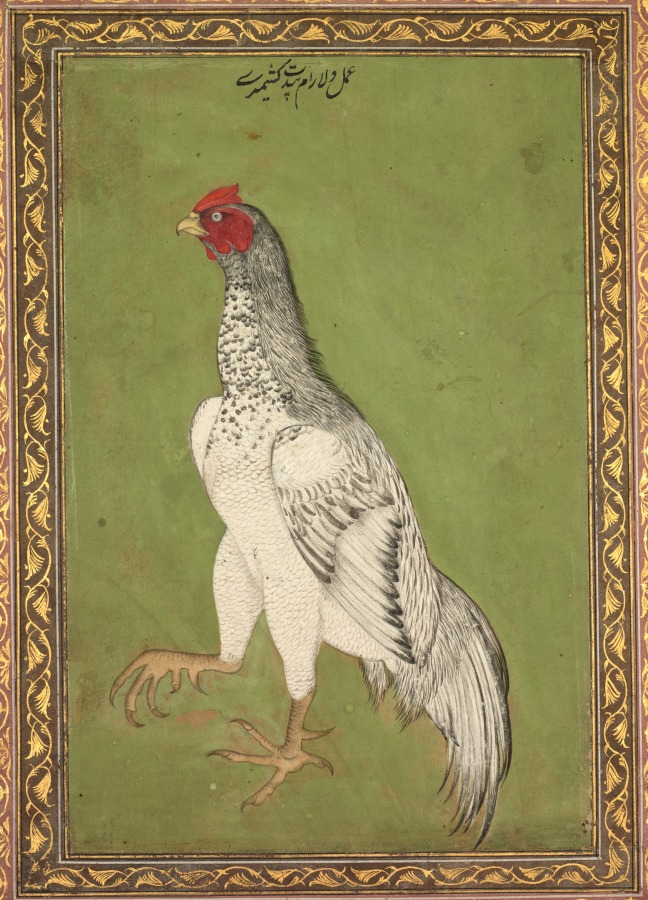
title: Rooster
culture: India, Mughal, 17th century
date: c. 1620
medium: Gum tempera, ink, and gold on paper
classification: Painting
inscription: verso, upper center: Dilaram Pandit Kashmiri (by a later hand)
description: This bird, with its fierce expression, sharp beak, and spurred feet, may have been a champion in the cockfighting ring. The Mughal emperor Jahangir requested that his royal court artists paint portraits of remarkable birds and animals with as much realism as possible. He felt that such paintings enhanced feelings of amazement beyond hearing or reading an account.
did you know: This page belonged to the owner of Cleveland’s Leisy Brewing Company, est. 1873.